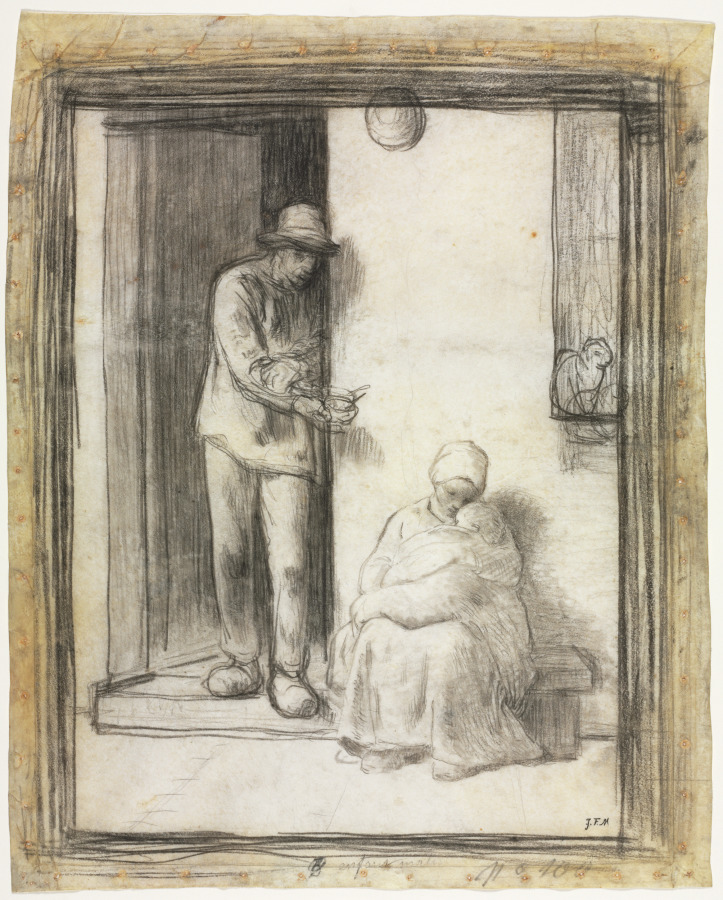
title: The Sick Child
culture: France, 19th century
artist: Jean-François Millet (French, 1814–1875)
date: 1858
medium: black crayon; framing lines in black crayon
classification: Drawing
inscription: by artist?, lower center, in black chalk: enfant mala[de] [partially erased] ; by artist?, lower center, in black chalk: 5 ; in graphite, lower center: [illegible: circled number?][written over the 5] ; lower center, in graphite: No 100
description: Jean-François Millet’s paintings of French rural life, especially those of peasants and farmers in their working environment, redefined the imagery of everyday life in the nineteenth century. Large-scale paintings such as The Gleaners (1857) presented the poorest of laborers with a dignity and nobility informed by classical traditions in French painting. At the same time he was working on major paintings for public exhibitions, Millet was also making smaller-scale drawings. Since drawings were less expensive, there was a much larger market for this type of work, and Millet created finished sheets in both black crayon and pastel as he catered to this demand. The work shown here is the first version of a theme the artist drew again in pastel in a more finished version (now lost). This crayon drawing shows, on the other hand, Millet’s thinking process. We can see him working out the composition because several changes are visible, most notably in the bowl held by the father and the cat in the window. Though taken from everyday life, Millet’s tender treatment of this family group recalls the biblical subject of the Holy Family.